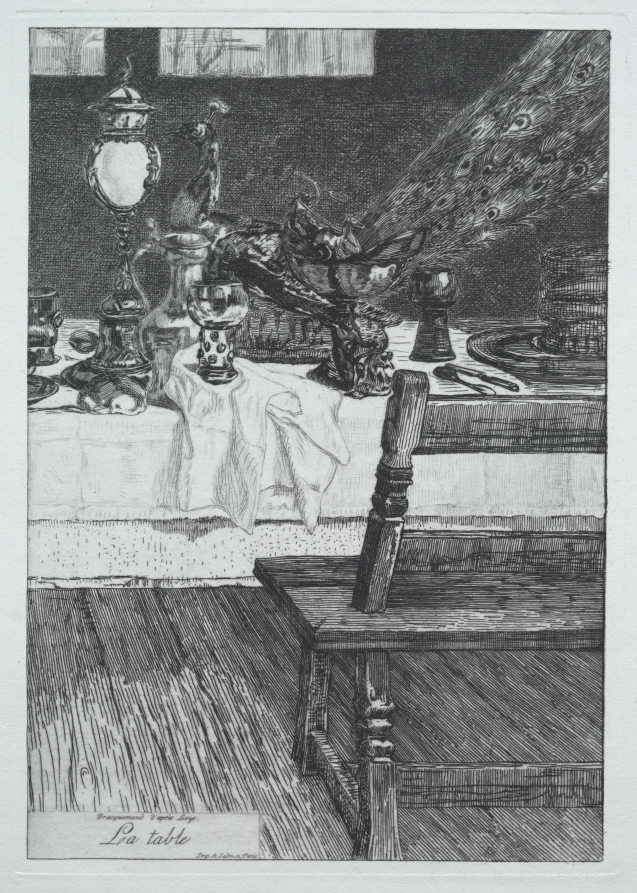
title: The Table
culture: France, 19th century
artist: Félix Bracquemond (French, 1833–1914)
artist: after Henri Leys (Belgian, 1815–1869)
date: 1868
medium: etching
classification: Print